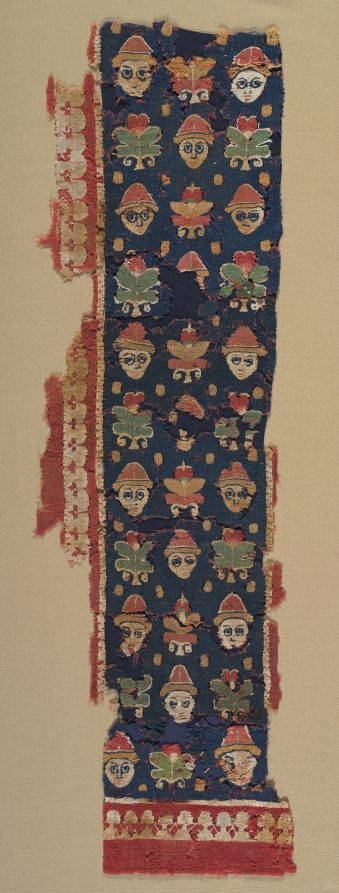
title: Border of Heads and Palmettes from a Large Hanging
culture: Egypt, Antinoë, Byzantine period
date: 500s CE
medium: Dyed wool, undyed linen; slit-tapestry weave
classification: Textile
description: Heads with caps facing front alternate with palmette (fan-shaped) leaves on a rich blue ground—a popular border design for luxurious woolen hangings whose field patterns often incorporated Iranian artistic features. An alternating red and white foliate (leaflike) design forms the secondary border.